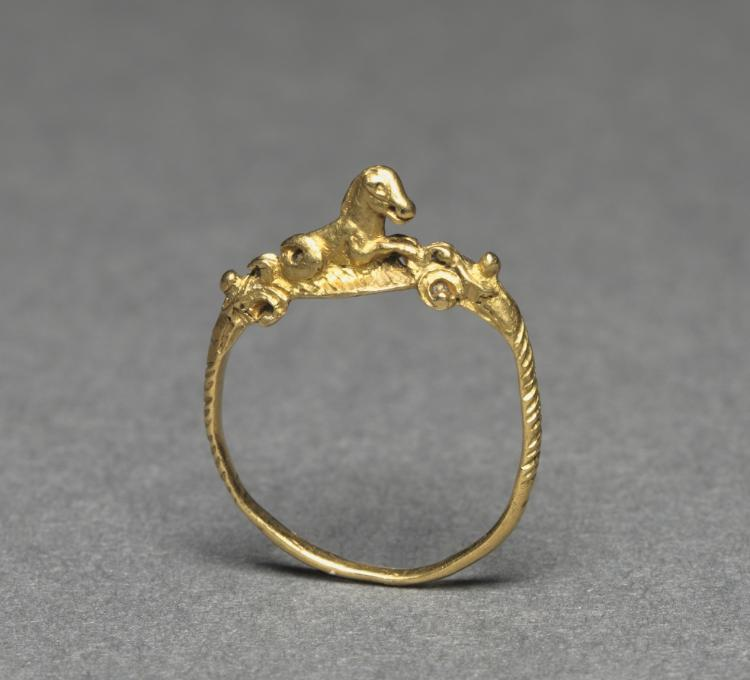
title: Ring with Hippocampus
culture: Italy, Roman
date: 100–200 CE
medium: gold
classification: Jewelry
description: This delicate gold ring is decorated with a tiny hippocampus, a creature from Greco-Roman mythology with the forequarters of a horse and the tail of a fish. Stylized waves bracket the hippocampus, crashing up against its tail and front hooves. The thin band of the ring is decorated with horizontal lines to the halfway point on both sides.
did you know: In Greek and Roman art, water spirits or nereids are often depicted riding hippocampi.